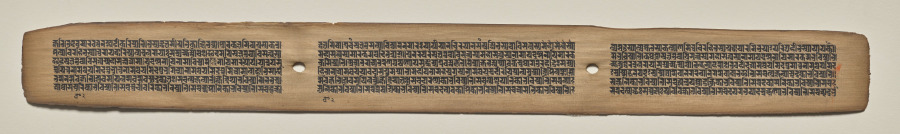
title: Text, Folio 136 (recto), from a Manuscript of the Perfection of Wisdom in Eight Thousand Lines (Ashtasahasrika Prajnaparamita-sutra)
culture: Eastern India, Bihar, Vikramashila Monastery. Painting: Nepal, Kathmandu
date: Sunday, September 14, 1119 (year 239 of the Newar Samvat in the month of Ashvina)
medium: gum tempera and ink on palm leaves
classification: Painting